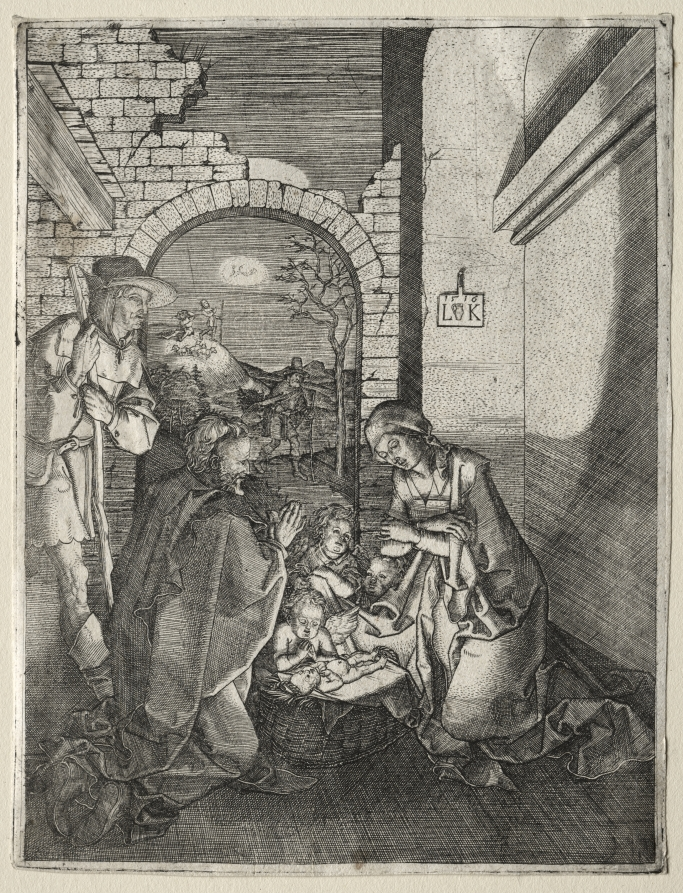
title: The Nativity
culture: Germany, Nuremberg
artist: Ludwig Krug (German, 1490–1532)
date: 1516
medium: engraving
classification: Print